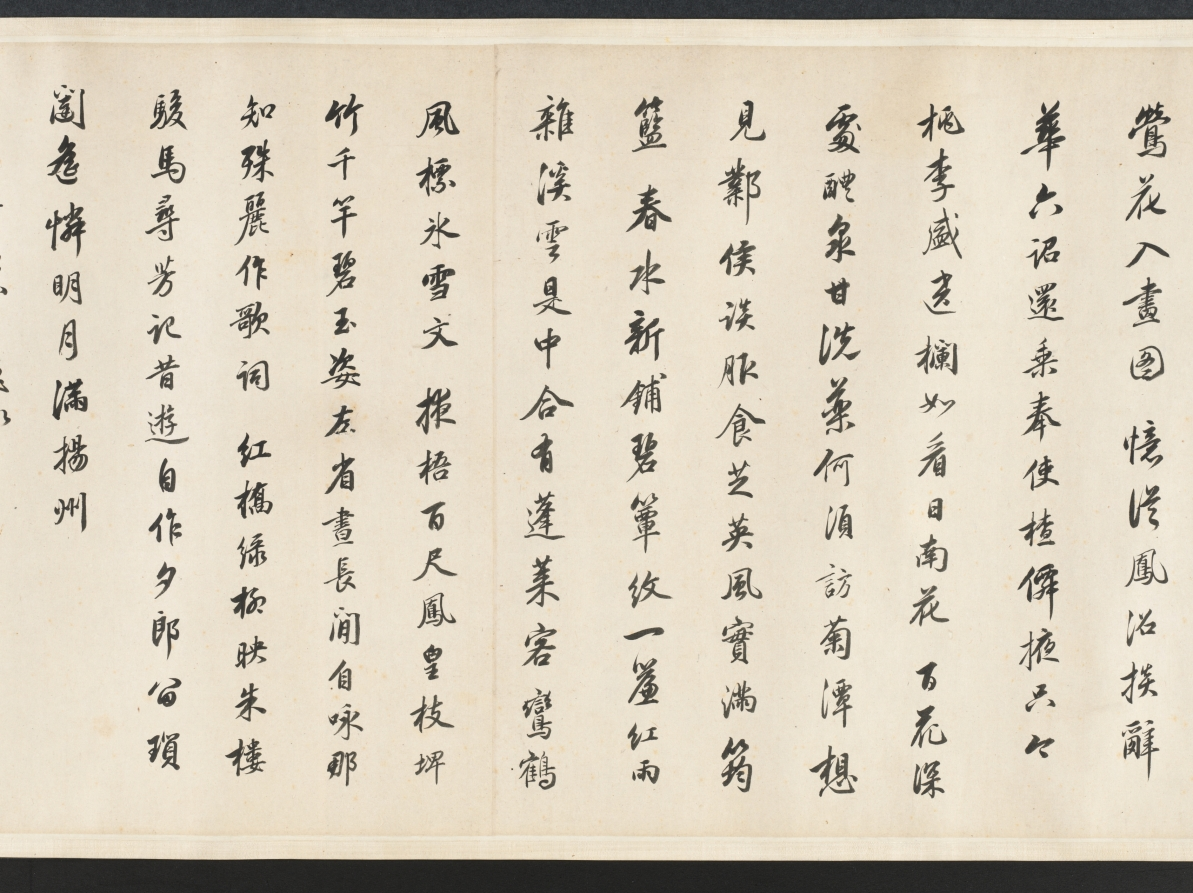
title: Cleansing Medicinal Herbs in the Stream on a Spring Day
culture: China, Qing dynasty (1644-1911)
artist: Yu Zhiding (Chinese, 1647–c. 1716)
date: 1703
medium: Handscroll; ink and color on silk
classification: Painting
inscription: Title by Chen Yixi.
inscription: 姑射仙人冰雪膚，新詩傳唱滿通都。/ 極知遲暮難為別，更展春泉洗藥圖。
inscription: Colophon by Chen Tingjing 陳廷敬 (1639–1712). Colophon by Wang Hongxu 王鴻緒 (1645–1723), dated 1707. Colophon by Song Luo 宋犖 (1634–1714). Colophon by Liu Yan 劉巗. Colophon by Jing Xikui 涇西夔. Colophon by Liu Yan 劉巗. Colophon by Cao Yin 曹寅. Colophon by Wang Shihong 汪士鋐. Colophon by Wang Shidan 王式丹 (1645–1718), dated 1712. Colophon by Shi Shenyi 史申義 (1661–1712), dated 1712. Colophon by Yin Yuqing 殷餘慶, dated 1712.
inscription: Colophon by Chen Shixia 陳時夏, dated 1729.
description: A famous portraitist, Yu Zhiding here depicts the likeness of Shi Shenyi 史申義 (1661–1712), an official and poet. Master Shi, a sickly man, was deeply interested in medicinal science. The opening section of the scroll features a boy washing a fungus in fresh spring water, a basket of medicinal herbs by his side. Other servants carry a fan, a bundle of scrolls, and a cup of tea or hot wine. Master Shi sits in a bamboo grove, surrounded by fields of herbs. Returning swallows, pink peach blossoms, and blooming magnolia indicate spring, whereas the fungus conveys wishes for long life. The spring theme may express the artist’s wish for his friend’s recovery.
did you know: In the pavilion are some of Shi Shenyi’s scholarly accoutrements: a stack of books, an antique zun 尊 (wine vessel), a brush holder, an ink stone, and a small chime.